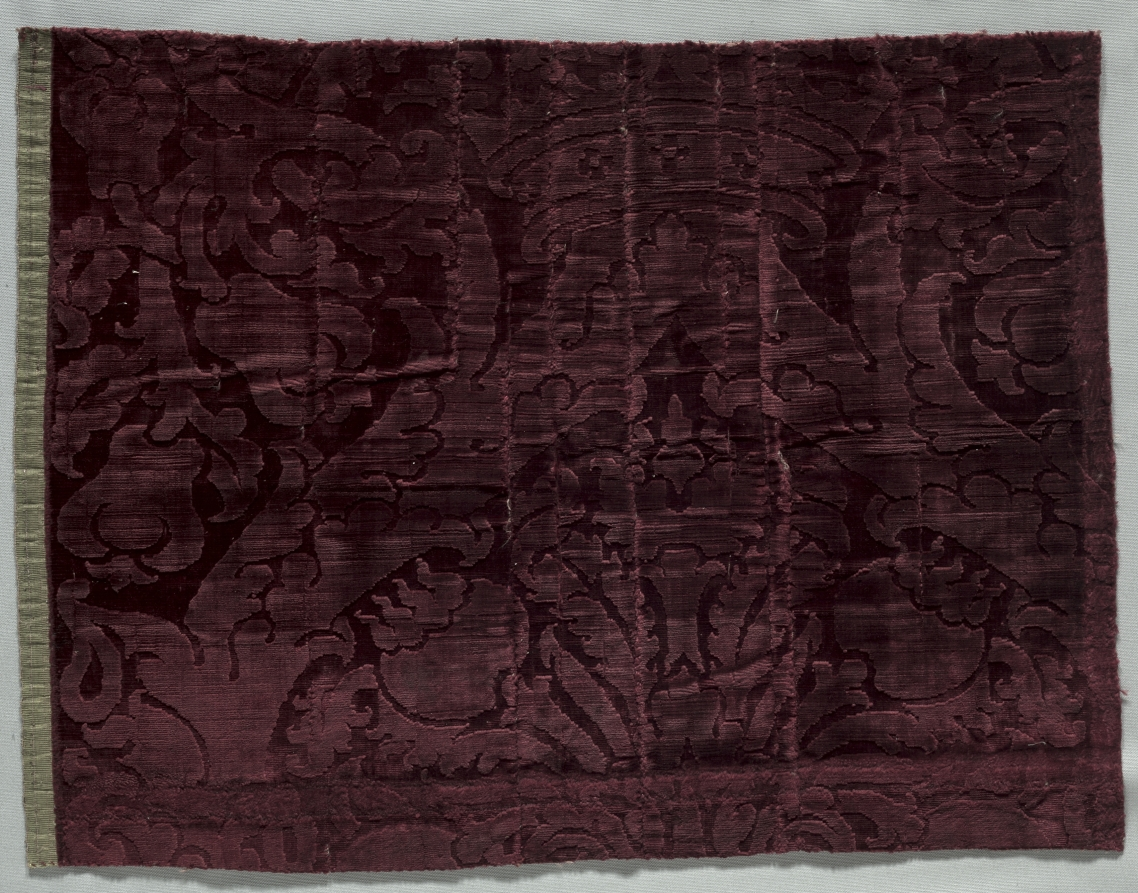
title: Velvet Fragment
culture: Italy, 16th century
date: 1500s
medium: velvet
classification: Velvet